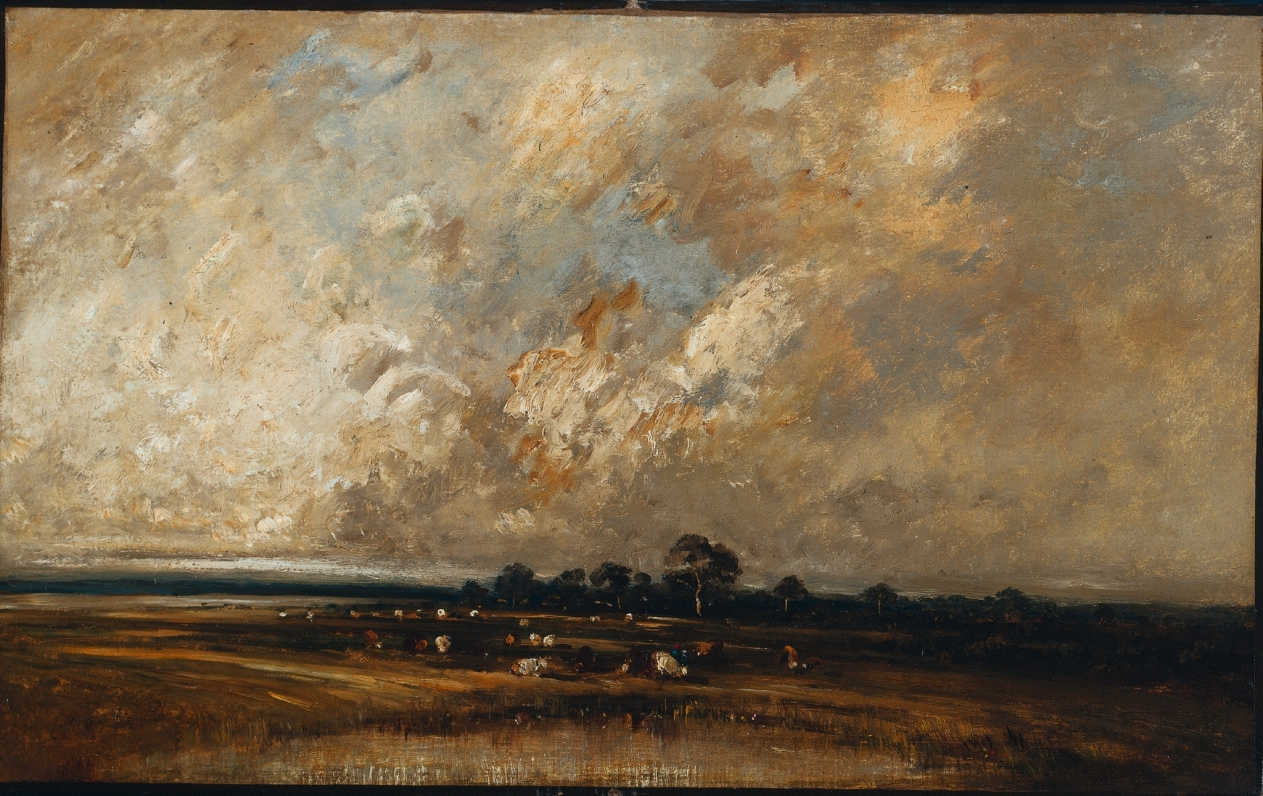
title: Marshland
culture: France, 19th century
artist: Jules Dupré (French, 1811–1889)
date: 1860s-1870s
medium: oil on fabric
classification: Painting